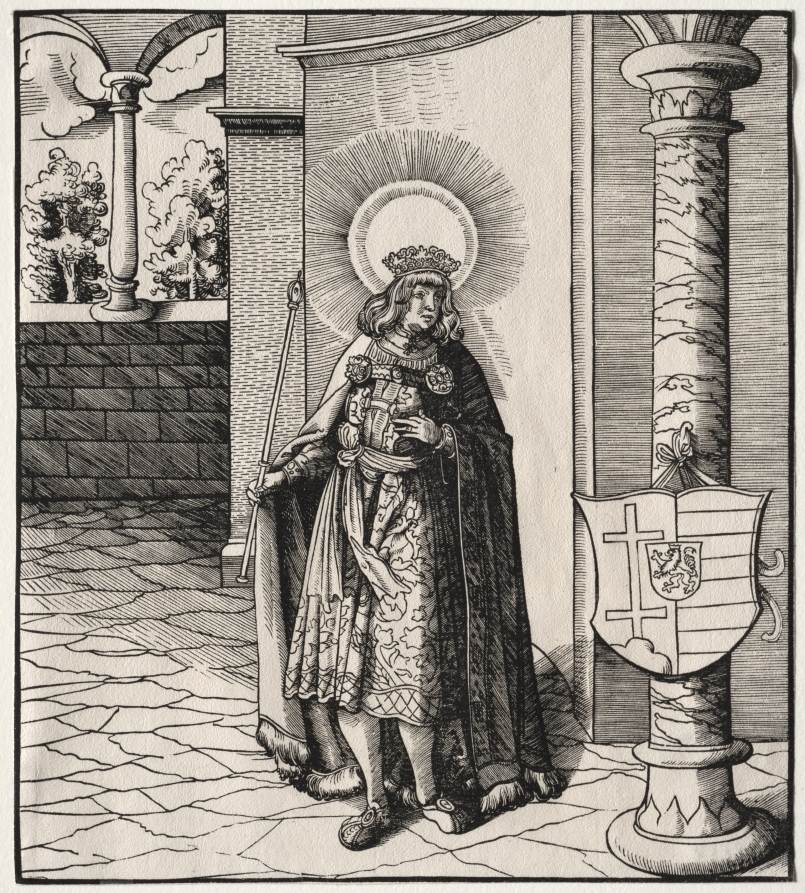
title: Saints Connected with the House of Habsburg: A General Account of the Ancestry of Emperor Maximilian I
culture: Germany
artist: Leonhard Beck (German, c. 1480–1542)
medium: woodcut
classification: Print